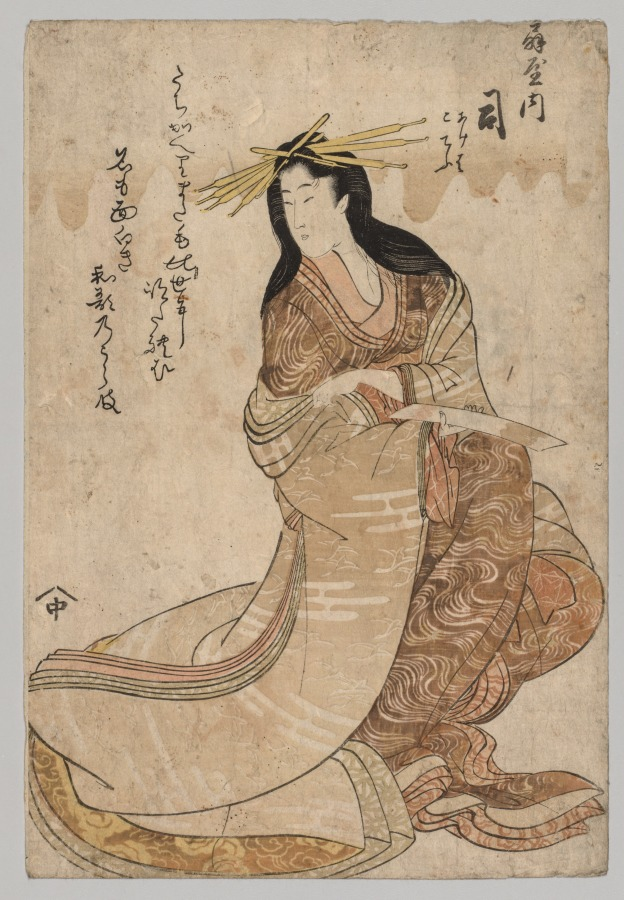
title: Tsubasa of Ōgiya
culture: Japan, Edo period (1615–1868)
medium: color woodblock print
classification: Print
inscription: Publisher Mark: Yamanaka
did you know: Tsubasa was a courtesan at the Ōgyia in Edo. The title of this print also lists her attendants (kamuro) Ageha and Kochō, but they are not depicted.